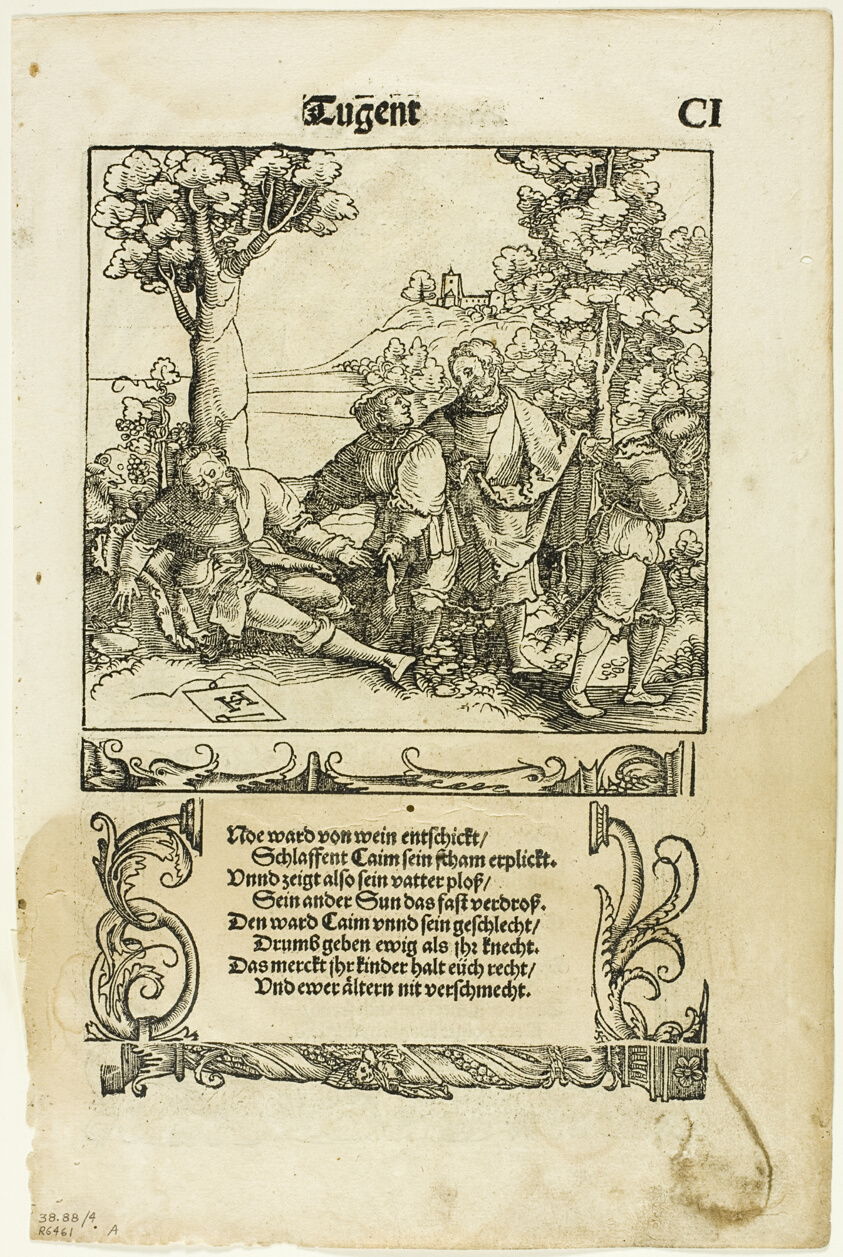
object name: Print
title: Shem Covering the Nakedness of Noah (recto) and Lot with his Daughters (verso) from Der Teutsch Cicero, plate four of Woodcuts from Books of the XVI Century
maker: Hans Leonhard Schäuffelein (German, 1480/90-1538/40); assembled by Max Geisberg (Swiss, 1875-1943)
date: 1534, assembled into portfolio 1937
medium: Woodcut on paper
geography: Germany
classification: woodcut; print; prints and drawing